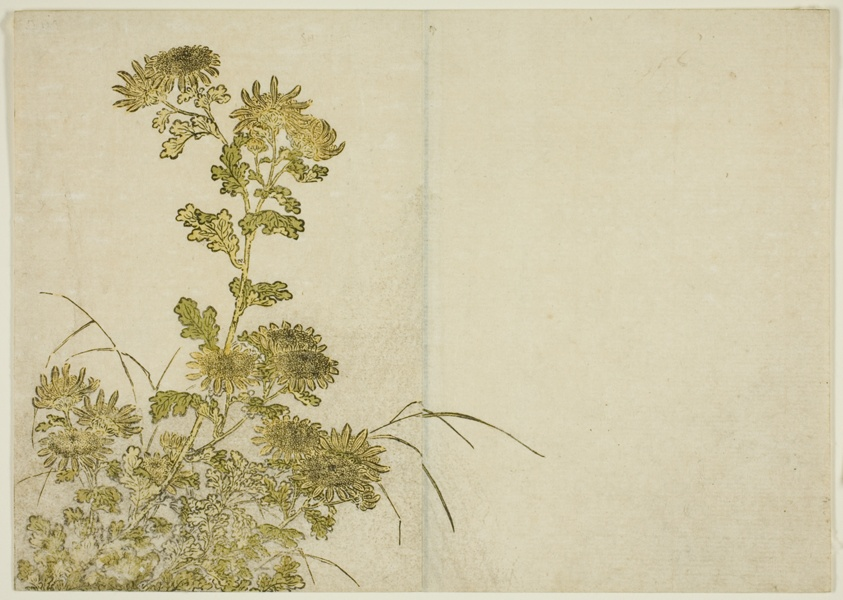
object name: Print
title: Winter Flowers: Chrysanthemums, from the book "Mirror of Beautiful Women of the Pleasure Quarters (Seiro bijin awase sugata kagami)," vol. 1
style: Japanese (culture or style)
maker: Katsukawa Shunsho; Japanese, 1726-1792; Kitao Shigemasa; Japanese, 1739-1820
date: 1776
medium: Color woodblock print; double-page illustration cut from a book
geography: Japan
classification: woodblock print; print; asian art